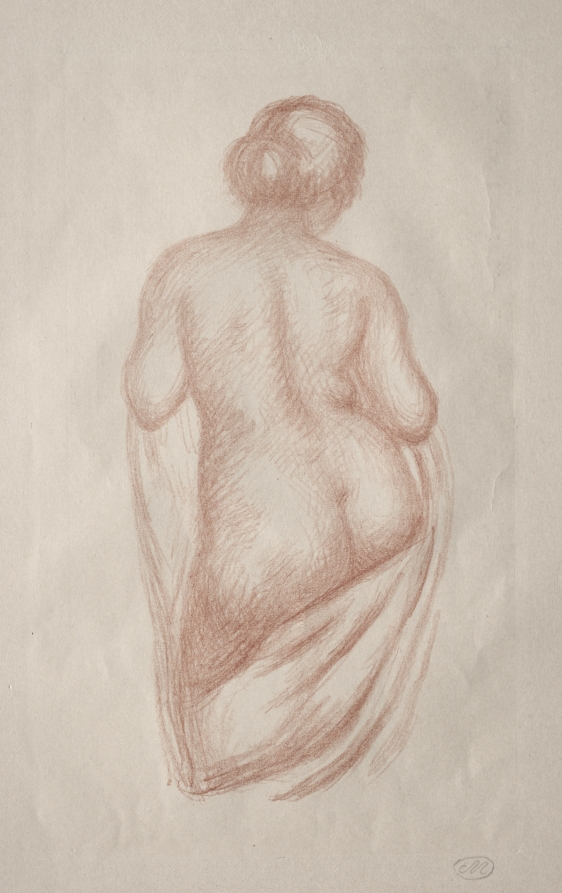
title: Woman Seen from the Back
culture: France, 20th century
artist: Aristide Maillol (French, 1861–1944)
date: c. 1900–1941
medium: lithograph printed in sanguine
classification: Print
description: Maillol was interested in conveying the sensual curves of the female form. As a sculptor he worked from both memory and drawings. He made numerous studies of the nude which are related to, if not directly preparatory for his sculptures. He explained, "The important thing is the general idea...I am seeking beauty, not character."